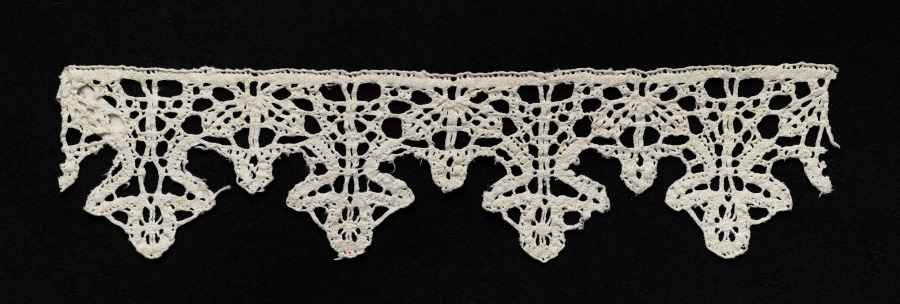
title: Lace Edging with Points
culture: Italy, Genoa(?)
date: 1600–1620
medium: Bobbin lace (needle lace design)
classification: Lace